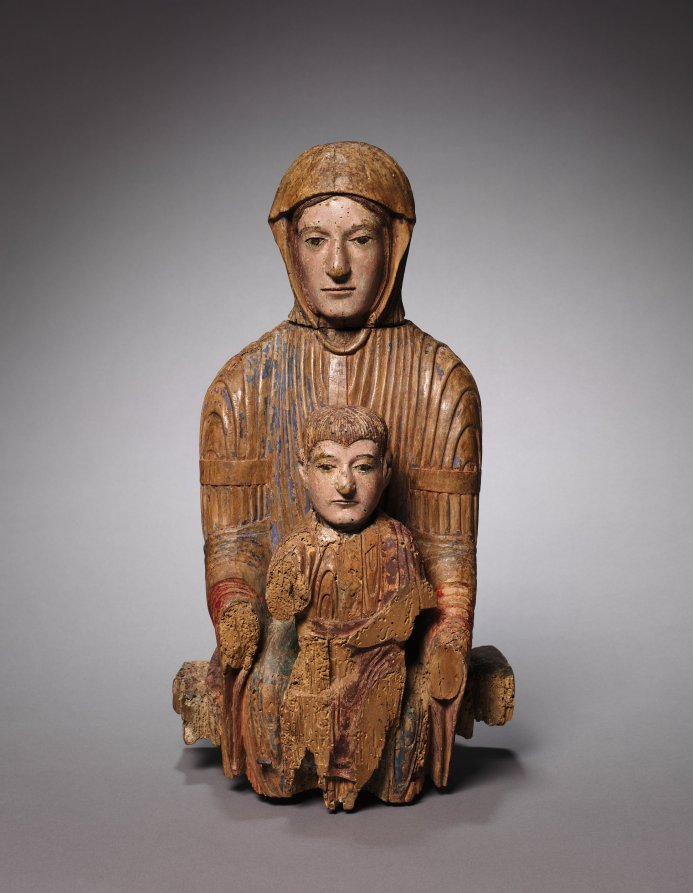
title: Virgin and Child in Majesty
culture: France, Auvergne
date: c. 1150–1200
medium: polychrome wood (walnut)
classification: Sculpture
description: This sculpture belongs to a group of early representations of the Virgin and Child known as the Sedes Sapientiae (the Throne of Wisdom). The subject embodies a complex and core Christian doctrine of the Virgin’s role in the Incarnation (the moment in which Christ became flesh) and ultimately in the redemption of humankind. Mary faces forward, her gaze toward the beholder. As she is seated on a throne, she in turn becomes the throne to the Christ child, thus symbolizing her role in giving birth not only to the human Jesus, but also to the divine Christ. The Incarnation gave Mary a unique role as principal mediator between heaven and earth, and between God and humankind. As a result, her image proliferated in art, especially after the 12th century, a period in which there was surging interest in Mary’s life and increasing devotion to her person and images. The sculpture belongs to a rare group of surviving figures produced in the Auvergne region of central France during the second half of the 12th century. These "Auvergne" Virgins are estimated to number only about 25 or 30 and are characterized by their linear, calligraphic draperies, which form beautiful swirls and contours. All such sculptures are smaller than life-size and made of wood in order to make them mobile. Evidence suggests that they were moved from altar to altar or church to church, and were frequently carried in procession within churches and town streets on Marian feast days. The heads were intentionally removable in order to "dress" them in costumes for such processions.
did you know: In this sculpture of Mary and Jesus, their heads are detachable.